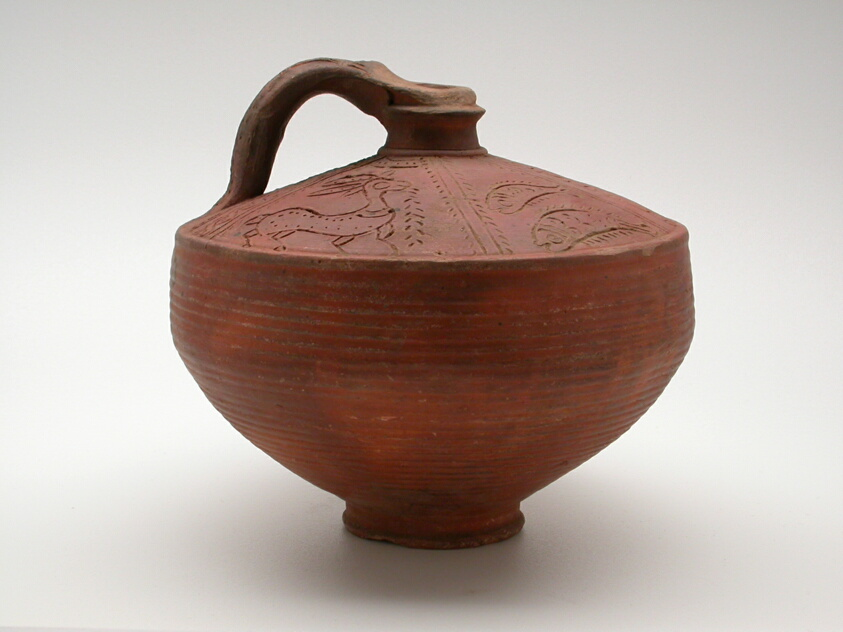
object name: Vessel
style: egyptian, ancient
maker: Egyptian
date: Roman Period (30 BCE–495 CE)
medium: Ceramic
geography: Egypt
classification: vessel; ceramics; ancient art; container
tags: dining, drinking